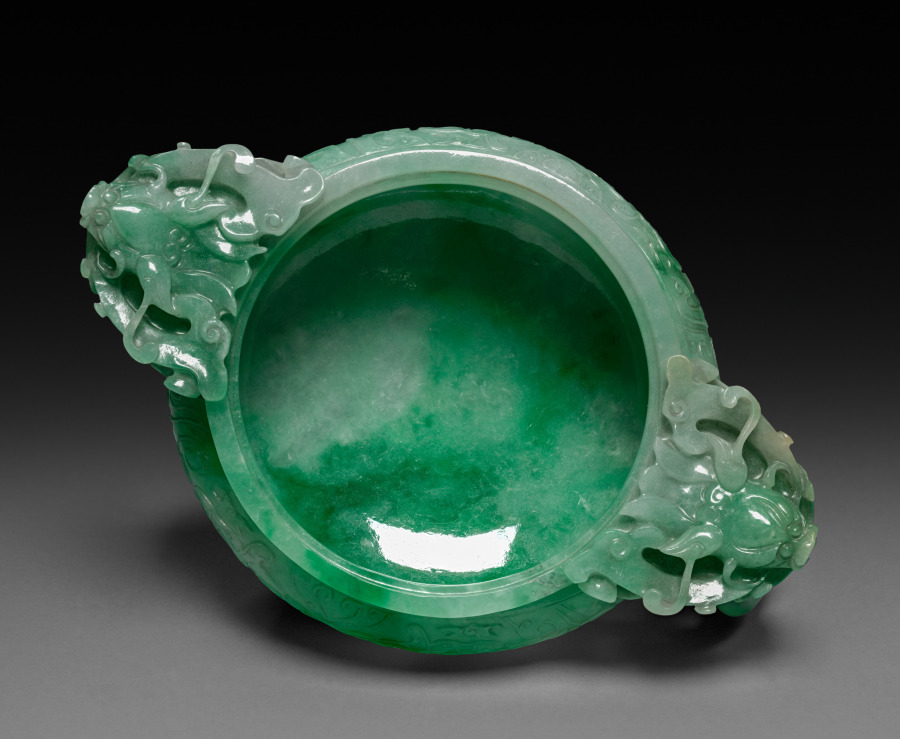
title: Incense Burner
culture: China, Qing dynasty (1644–1911), Qianlong reign (1736–95)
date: 1736–95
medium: jade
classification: Jade